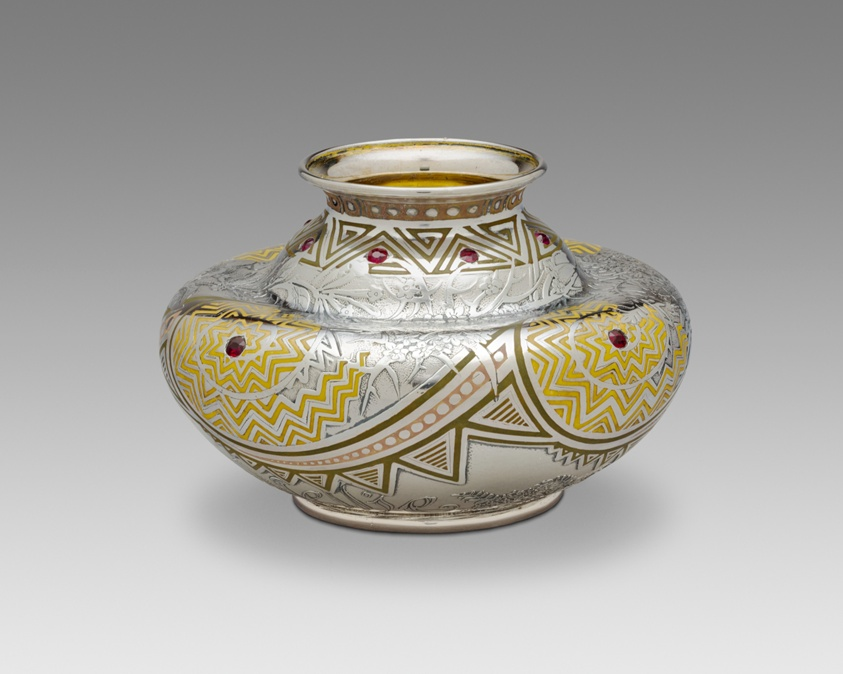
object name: Metalwork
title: Pueblo Vase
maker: George Paulding Farnham (American, 1859–1927); Tiffany and Company (American, founded 1837); New York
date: 1893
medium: Sterling silver inlaid with yellow, green, and pink enamel, set with twelve faceted rubies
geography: New York City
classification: vase; vessel; decorative arts